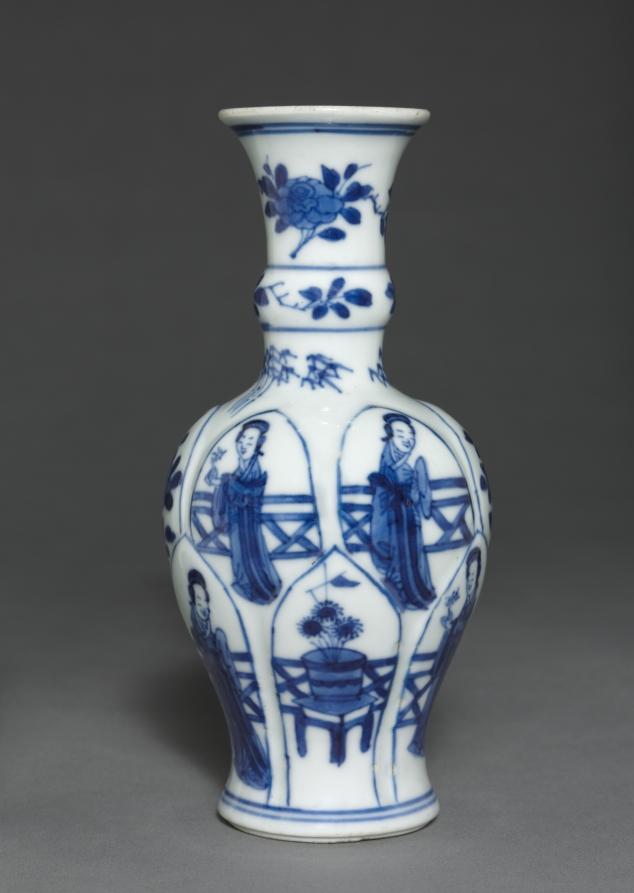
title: Vase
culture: China, Qing dynasty (1644-1911)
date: 19th Century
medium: porcelain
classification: Ceramic